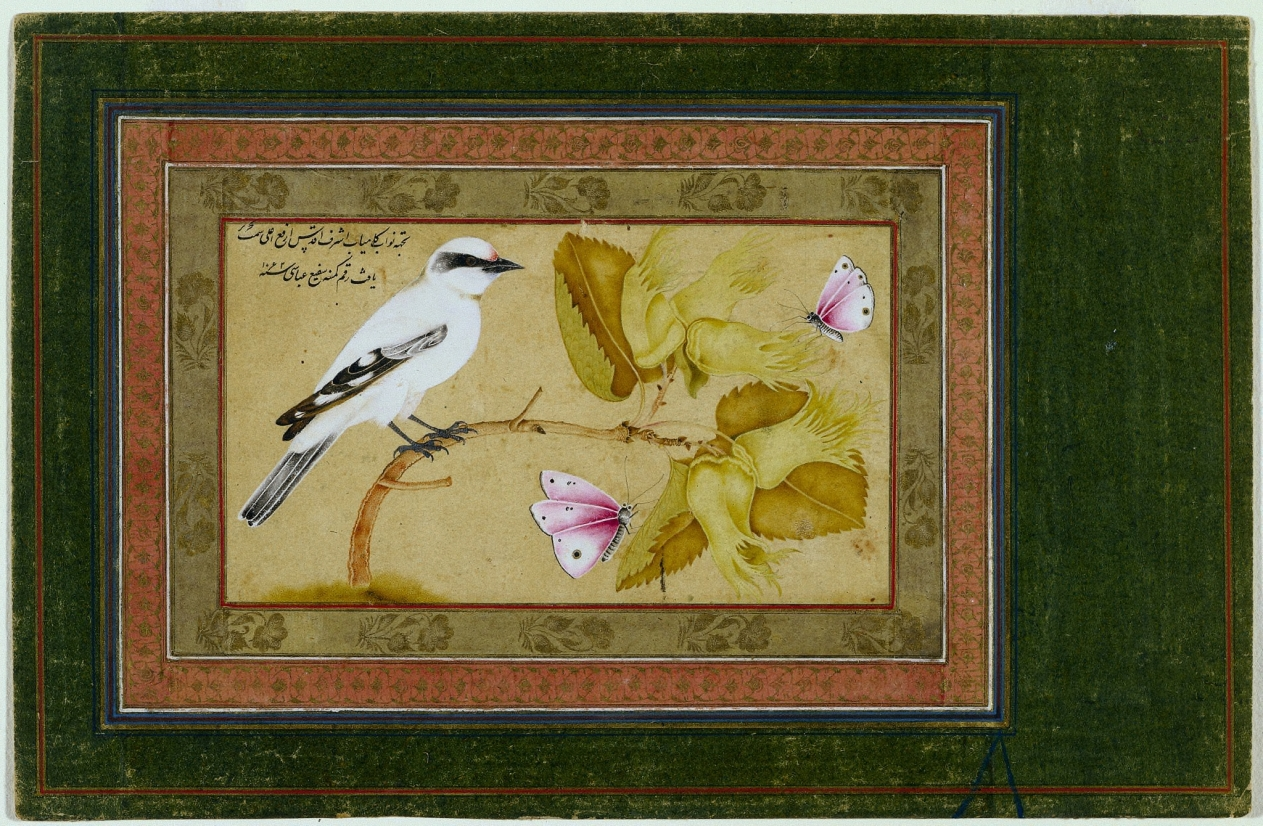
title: Black and White Bird Perched on a Shrub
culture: Iran, Isfahan, Safavid period (1501-1722)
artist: Shafi' Abbasi (Iranian)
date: 1651–52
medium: opaque watercolor, ink, and gold on paper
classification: Manuscript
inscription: "For the successful nawab, the most honorable, most holy, and most high, [who is] of exalted position, it was drawn by the qalam of the humble Shafi' 'Abbasi in the year 1062 (1651–52 AD)."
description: In Iran between the 1630s and 1650s, the court painter Shafi’ ‘Abbasi, son of the renowned painter Riza ‘Abbasi, specialized in a new fashion depicting naturalistic plants and birds, some adapted from European sources such as botanical engravings or herbals. Several have been identified as patterns for textiles, evidenced by pricked holes along the contours, which allowed designs to be transferred to another surface. The inscription indicates that Shafi’ ‘Abbasi made this painting for Shah Abbas II in 1651-52. Presumably, he copied this composition from a European engraving.